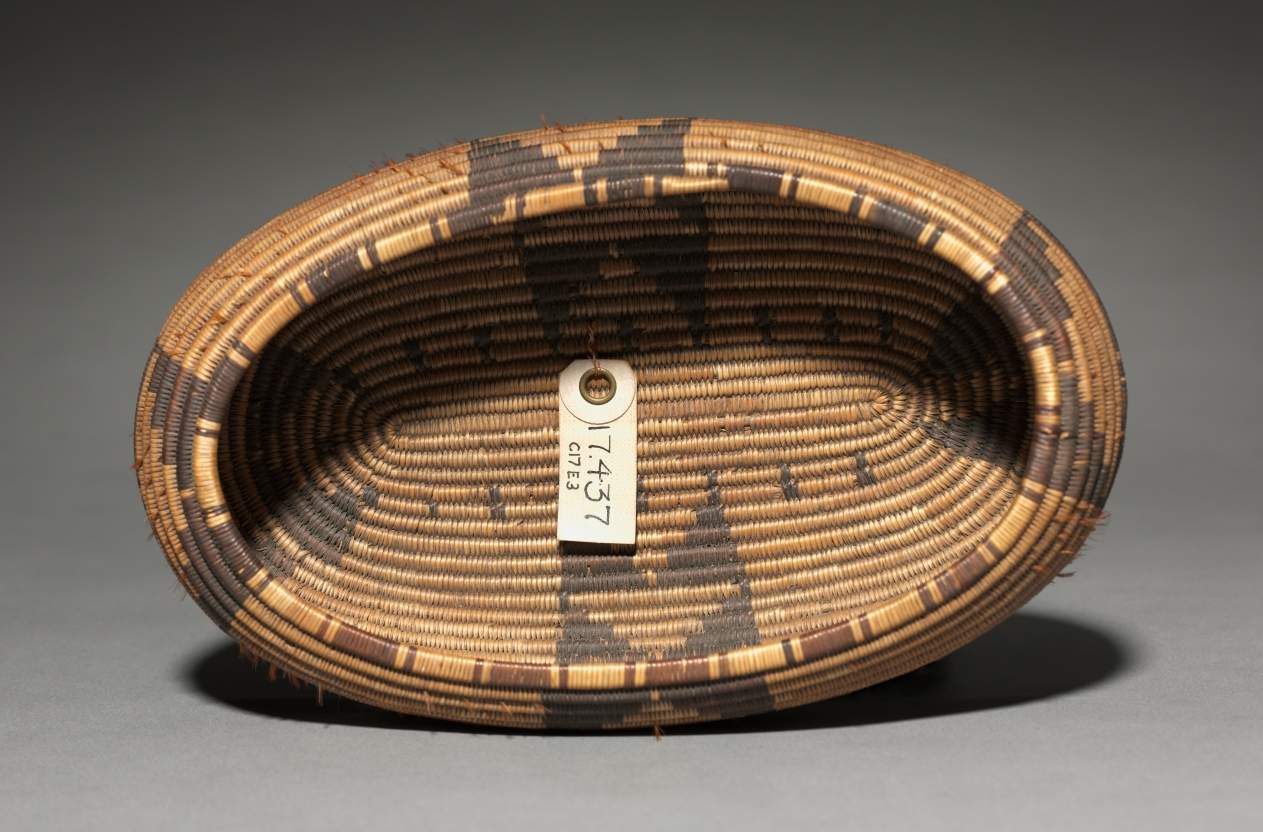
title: Gift Bowl, Canoe- Shaped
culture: California, Pomo, late 19th- early 20th century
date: 1890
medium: Willow, Bulrush, Sedge, with feather and acorn woodpecker; coiled (3 rods)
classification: Basketry